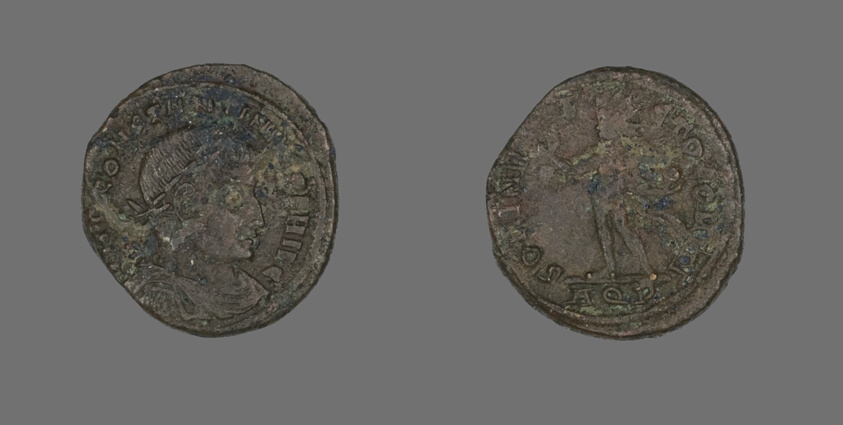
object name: Coin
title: Coin Portraying Emperor Constantine I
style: roman (ancient, style or period), ancient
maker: Roman, minted in Aquileia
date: 317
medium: Bronze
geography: Roman Empire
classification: coin; ancient art